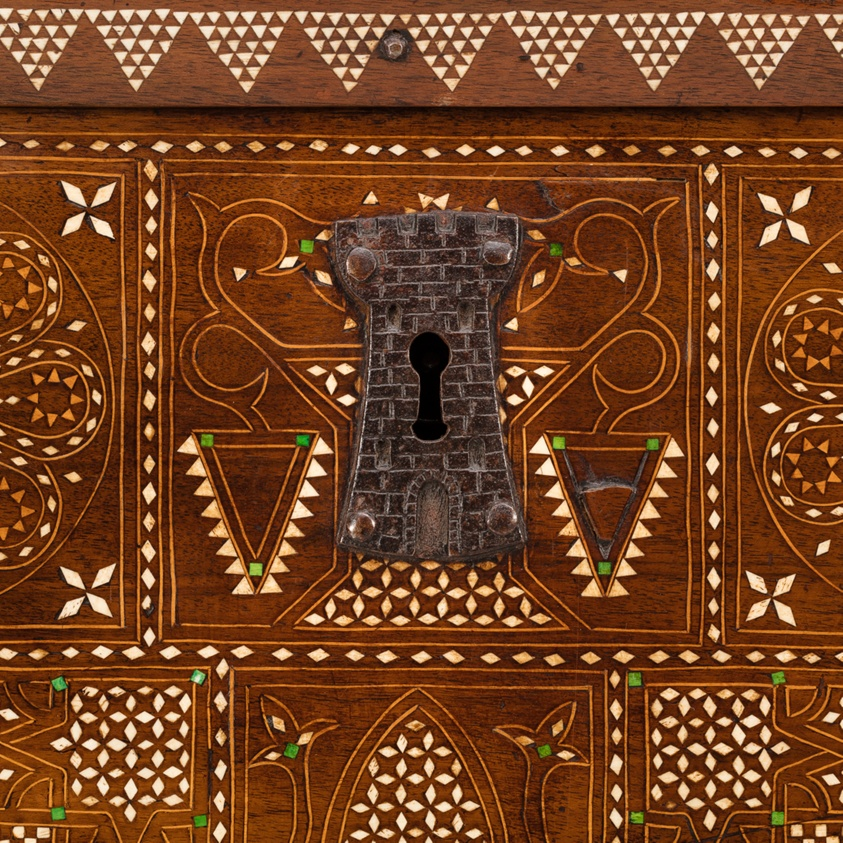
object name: Furniture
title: Writing Cabinet (Escritorio)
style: Islamic, hispano-moresque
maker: Spanish, possibly Granada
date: 1500/50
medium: Walnut, boxwood, bone, iron, copper alloy, and gilding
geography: Granada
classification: furniture; islamic; decorative arts; furnishings; furnishings (transportable); inlay; writing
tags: geometric